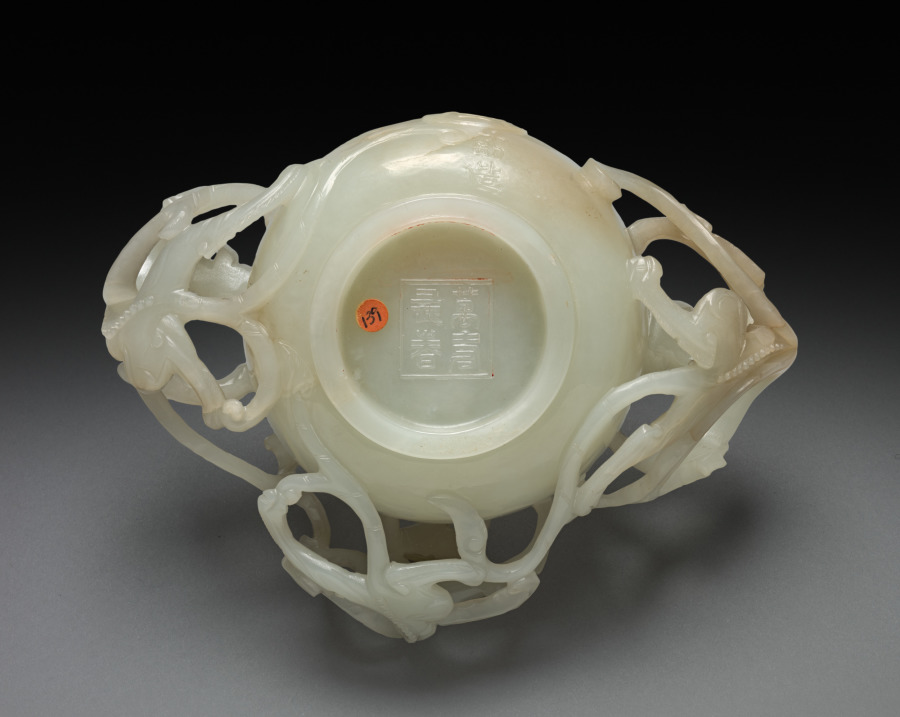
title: Cup with Dragon Handles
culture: China, Qing dynasty (1644-1911), Kangxi reign (1662-1722)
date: 1662–1722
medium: Pale gray-green white jade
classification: Jade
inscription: 萬壽長春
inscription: 壽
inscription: 子剛造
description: Three dragons, auspicious symbols for good fortune, grasp the rim of this bowl. A large shou (longevity) character is visible on the outside wall. Drinking cups with dragon handles were elite luxuries. The yellowish-white color and refined techniques are characteristic of Suzhou workshops that served the court, scholar-officials, and the merchant class. The optimistic attribution to Lu Zigang (late 1500s), a jade master recorded to have been active in Suzhou, suggests that its maker used the master’s name to attract wealthy clients eager to demonstrate their refined taste and connoisseurship.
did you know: Auspicious inscriptions on the base and front of the jade cup convey wishes for longevity.